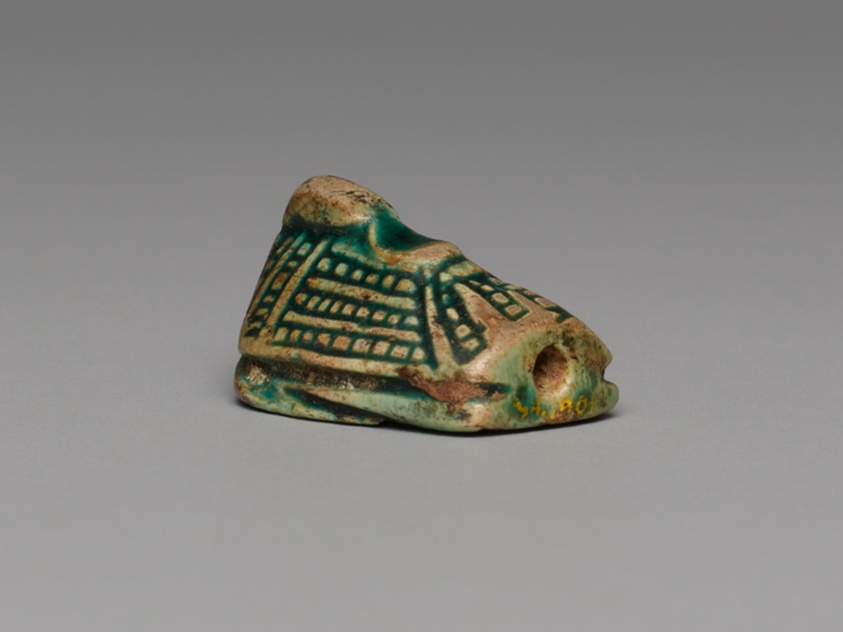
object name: Costume and Accessories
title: Scaraboid in the Form of a Duck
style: new kingdom, egyptian, ancient, eighteenth dynasty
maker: Egyptian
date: New Kingdom, Dynasty 18 (about 1550–1295 BCE)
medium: Glazed steatite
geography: Egypt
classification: scaraboids; seal; amulet; ancient art; costume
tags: ducks, cobras, musical instruments